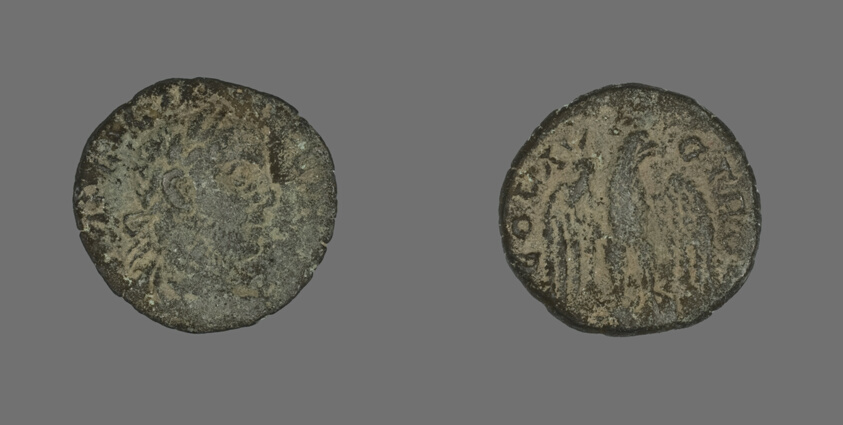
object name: Coin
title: Coin Depicting Bust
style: roman (ancient, style or period), ancient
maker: Roman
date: 306-309 (?)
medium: Bronze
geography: Roman Empire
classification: coin; ancient art